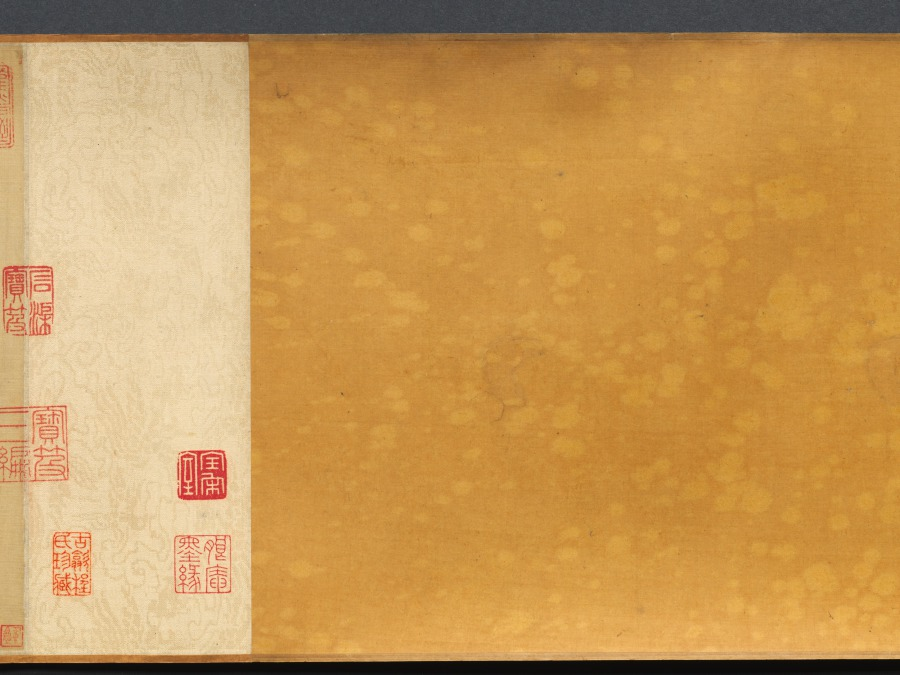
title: Flowers of Four Seasons, with Poems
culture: China, Ming dynasty (1368–1644)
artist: Wang Guxiang (Chinese, 1501–1568)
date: 1531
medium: handscroll; ink and light color on silk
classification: Painting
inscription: Artist's inscription, signature, and 15 seals. Ink Orchids. Sewn as pendants for the man of worth, swaying quiety, fragrance in the valley. [seal] Hsiao-chu ts'un Peony. Wiping his face, the young gentleman Ho [Ho Yen of Wei, Three Kingdoms] appears to have been powdered. His previous life was the perfume-stealing Han Shou [of Chin, 265–419 CE], the fragrance still lingers. [seal] Ts'un-wu chai. Flowering Crab Apple, New Bamboo. Shao-lin [Du Fu, 712–770] had to put down his brush. [Flowering Crab Apple]. Yü-k'o [Wen T'ung, d. 1079) in vain wrote poems about [Bamboo]. [seal] Yu-shih. Lotus Flowers. When she turns her head, half-hidden by a fan, and casts a glance, all the beautiful women become colorless. [seal] K'ang yüeh huai. Loquat. Ripeness in summer. [seal] Lu-chih. Pomegranate Flower. Whenever I remember you I will send my thoughts, but where have you gone--the [skirt] of pomegranate red? [seal] Wu-ho Sheng. Day Lily. Plant the day lily to forget sorrow. [seal] Yu-shih. Chrysanthemum. The untrammelled joy at the eastern fence. [seal] Lu-chih. Begonia. Comparing it to the beauties of Spring, and spreading them out as trimming for the stone steps. [seal] Yu-shih. Hibiscus. In recent years I have always enjoyed looking at flowers; instead of dark red I preferred pink ones. [seal] Jen-sheng i-lou. Narcissus, Camellia. The jade girdle left behind at Lo River. [Narcissus]. The precious pearls glitter before Spring. [Camellia]. [seal] Lu-chih. Heavenly Bamboo (Nandina domestica). A single branch in the wintry season. [seal] K'ang yüeh huai. Plum. Fragrant snow in the Lo-fou Mountains. [seal] Ts'un-wu chai. In the eleventh lunar month of the hsin-mao year of the Jiaqing era [1531], [I] imitated the boneless style of Yüan masters in sketching from life. Guxiang [seals] Yu-shih; Lu-chih. Translated by Wai-kam Ho/Lingyun Shih Liu (1980)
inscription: 2 colophons and 23 additional seals: 1 colophon dated 1632, and 2 seals of Li Jih-hua [Li Rihua] 李日華 (1565–1635); 1 colophon and 2 seals of Xiang Shengmo 項聖謨 (1597–1658); 3 seals of Liang Qingbiao 梁清標 (1620–1691); 6 seals of the Jiaqing 嘉慶 emperor (r. 1796–1820); 9 seals of Ch'eng Ch'i [Cheng Qi] 程琦 (1911–1988)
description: In this painting, flowers are loosely arranged by the seasons: narcissus and peony represent early spring; yellow loquat and lotus, summer; chrysanthemum, autumn; and the plum and evergreen bamboo, winter. The artist added to each flower a poetic line of calligraphy associating each plant with a historic or legendary figure. For example, the chrysanthemum, along with the line “The untrammeled joy at the eastern fence,” refers to the poet Tao Yuanming (died AD 427) who enjoyed chrysanthemums at the eastern fence in his garden. The scroll illustrates Wang Guxiang’s mastery of free brushwork, combining light monochrome ink with transparent colors. In his inscription, Wang says he used the “boneless” style without outlines as developed during the Yuan dynasty (1279–1368). Wang was a native of Changzhou, a city in southeast China known for its rich flora and fauna, and flower-and-bird painting tradition.